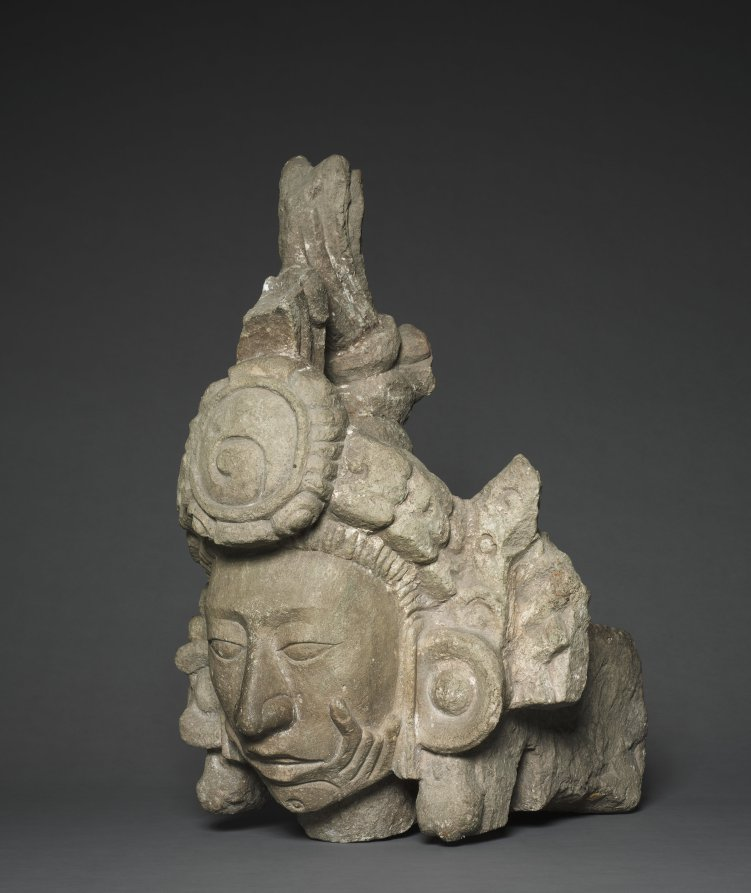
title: Head of a Young Noble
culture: Honduras, Copán, Structure 10L-22A, Maya style (250-900)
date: 746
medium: stone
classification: Sculpture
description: This young noble may be a political official of 8th-century Copán, an important site in eastern Maya territory. The noble, who embodies the Maya ideal of masculine beauty, wears circular ear ornaments and a headband, above which the tied hair rises. The meaning of the disembodied hand that cups the chin is debated. The head, collected by Harvard archaeologists in the 1890s, comes from the facade of a building may have been used as a council house by a Copán ruler and his advisors during a crisis that rocked the city’s ruling dynasty. On the structure’s upper level, above woven mat signs that symbolized political authority, eight figures were enthroned in T-shaped recesses. This head is from one of these figures. Beneath each recess was a hieroglyph thought to name an important town (or family) within Copán’s domain. The figures may represent these towns’ advisors to the king, whose image crowned the structure.